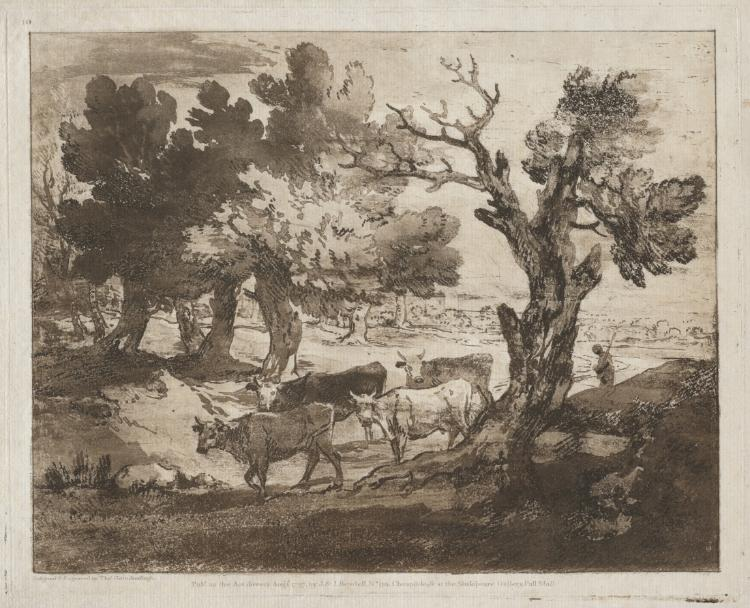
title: Wooded Landscape with Herdsman and Cows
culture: England, 18th century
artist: Thomas Gainsborough (British, 1727–1788)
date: c. 1780–1785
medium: etching and aquatint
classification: Print